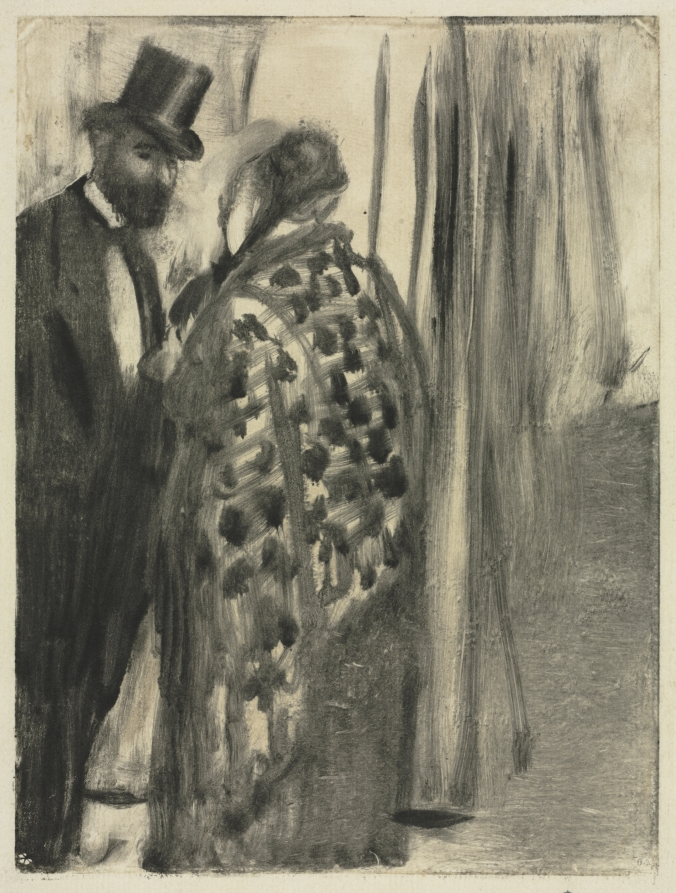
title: Conversation: Ludovic Halévy and Madame Cardinal (The Conversation) for "La Famille Cardinal" by Ludovic Halévy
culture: France, 19th century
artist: Edgar Degas (French, 1834–1917)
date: c. 1880–83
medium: monotype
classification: Print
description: This print comes from a series of more than 30 monotypes that Degas planned as illustrations for La Famille Cardinal by the artist’s friend Ludovic Halévy. The satirical stories revolve around two young dancers at the Opéra, Pauline and Virginie Cardinal, and their procuress mother. In late 19th-century Paris, the ballet was the profession of lower-class girls and young women who were available for sexual hire. Here, in the opening scene, Halévy, the first-person narrator, meets with Madame Cardinal in the coulisses (wings) of the Opéra to arrange for a private rendezvous with one of her daughters. The dancers, whose sexual availability is the subtext of the composition, are conspicuously absent.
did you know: Ludovic Halévy once co-authored a play, La Cigale, in which one of the characters was clearly based on Edgar Degas.